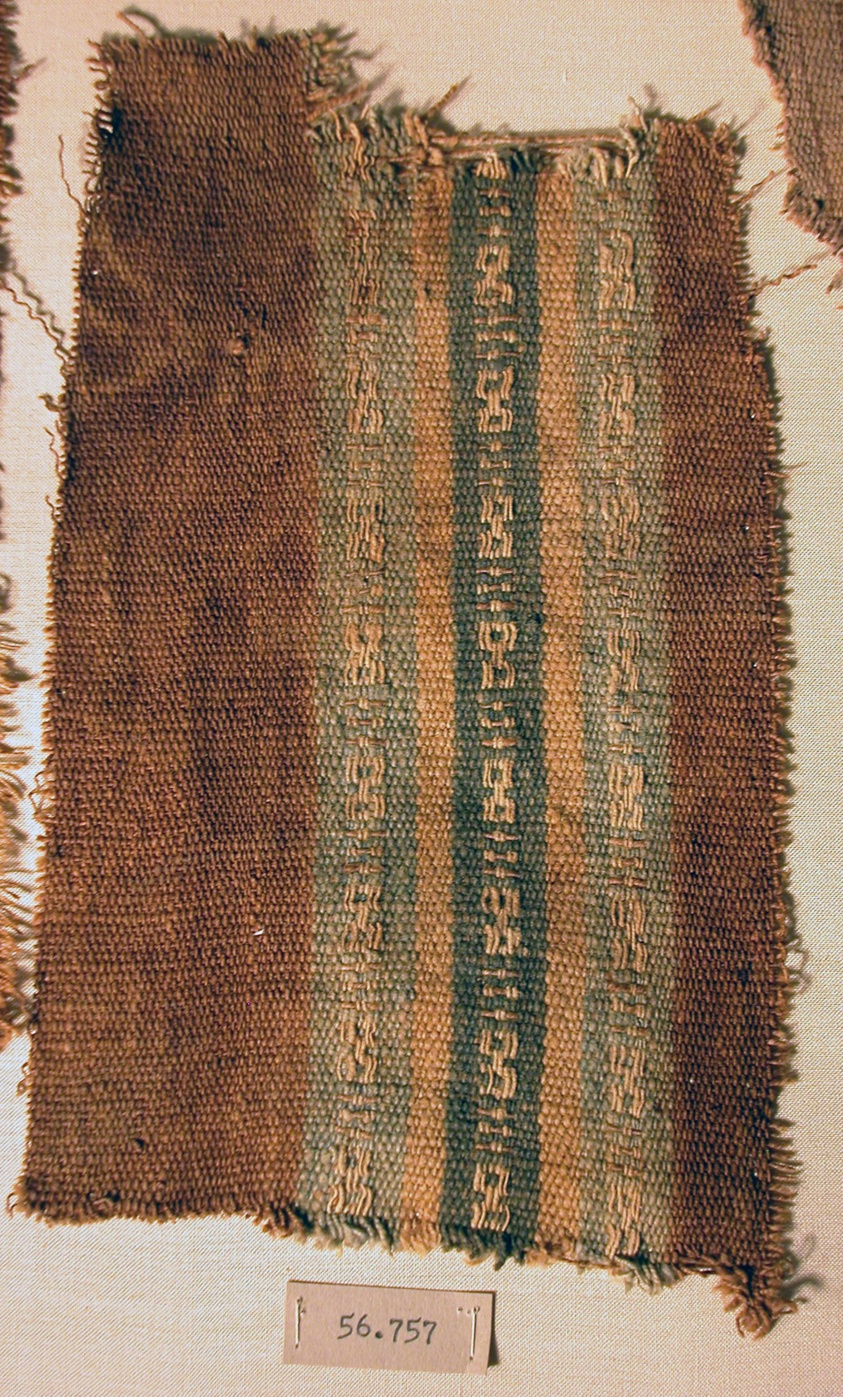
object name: Textile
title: Fragment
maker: Peru, north coast, Culebra Valley, La Capilla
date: A.D. 1000/1476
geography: Peru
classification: textile; weaving